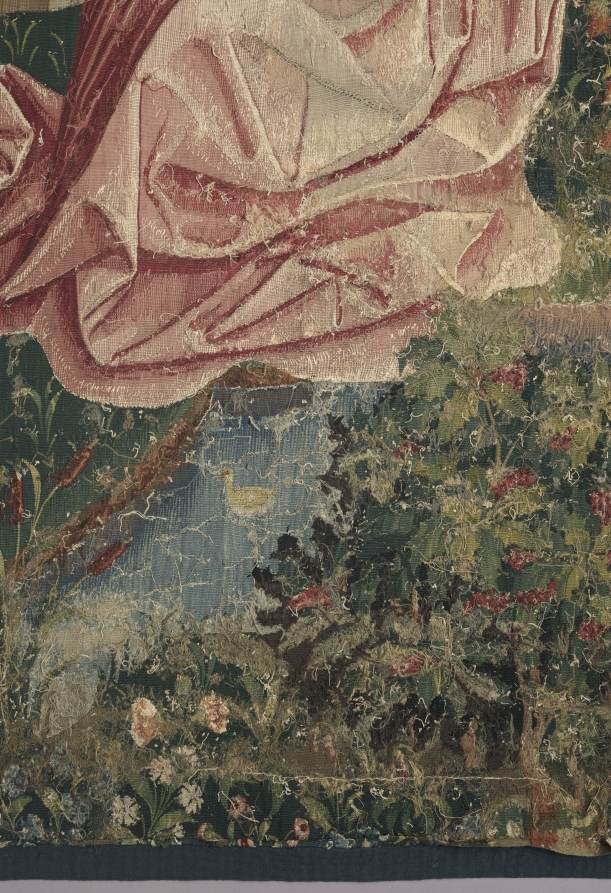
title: The Triumph of Eternity (from Chateau de Chaumont set)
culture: France, Lyon(?), early 16th century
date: 1512–15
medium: silk and wool; tapestry weave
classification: Tapestry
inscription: French verse in Gothic letters translates as follows: "Nothing triumphs by right authority, Unless it be conducted by Eternity. Nothing is permanent beneath the firmament, But above us triumphs Eternity."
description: The Triumph of Eternity is represented by the Coronation of the Virgin. Dressed in crimson velvet with an opulent brocaded velvet shawl, the Virgin is seated in the center as two angels hold a crown over her head. Five musical angels surround her playing an organ, recorder, straight cornetto, harp, and lute, while another sings from an open music book. The scenes in the set display a conservative style in which the figures are placed in shallow landscapes, thereby ignoring pictorial innovations for depicting space and mass. The verse in Old French at the top states: Nothing triumphing by due authority Remains permanent and durable. Nothing is permanent under the heavens, But above, eternity triumphs.